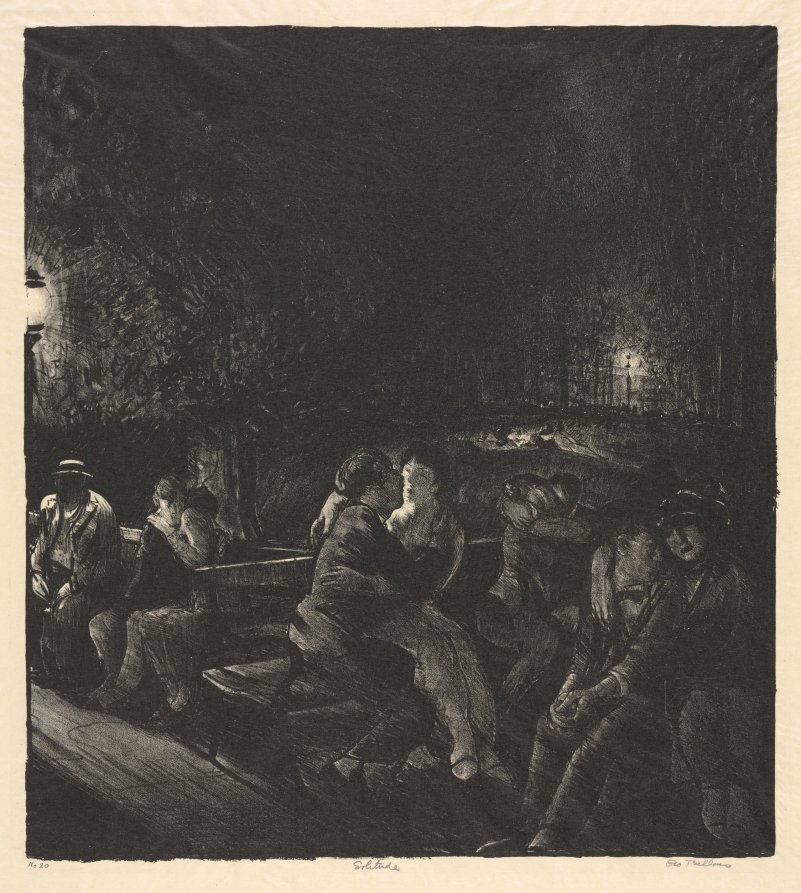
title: Solitude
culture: America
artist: George Bellows (American, 1882–1925)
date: 1917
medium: lithograph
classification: Print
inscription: In graphite, lower left, recto: "No 20"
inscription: In graphite, center, recto: "Solitude"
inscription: In graphite, lower right, recto: "Geo. Bellows"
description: In addition to leisure and recreation, city parks provided a place where couples could spend time together away from families and crowded apartments. Emphasizing the murky black of the night, George Bellows used tusche, a greasy ink, layered over lithographic crayon to create the mood of this print of park benches full of couples too absorbed in each other to notice anyone around them. A solitary man along the left edge is both physically and psychologically isolated from the others. Bellows often placed observers in his prints to suggest a connection between them and the viewer.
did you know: The benches in this image are a specific type called the “Central Park settee.”